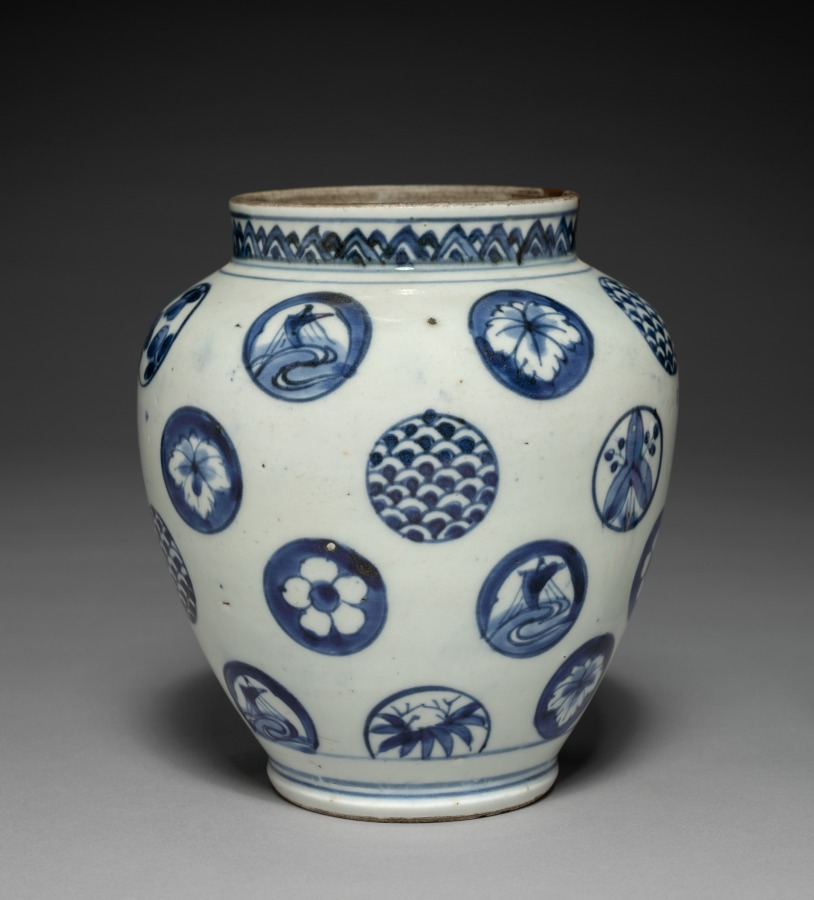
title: Jar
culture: Japan, Edo period (1615–1868)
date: early to mid-1800s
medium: porcelain with underglaze blue (Hizen ware, Arita type, Imari style)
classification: Ceramic